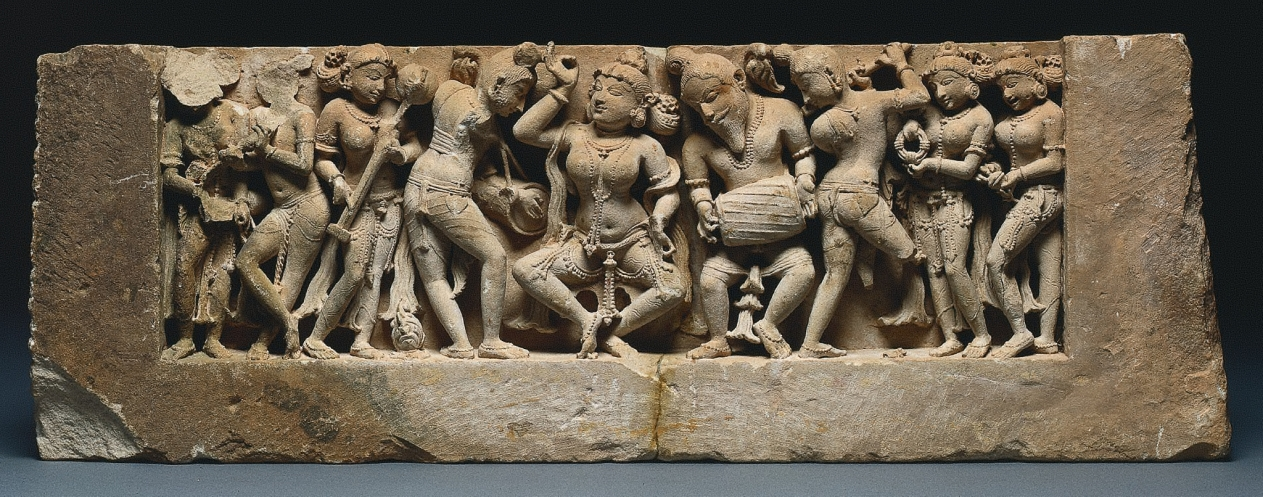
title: Frieze with Dancer and Musicians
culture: Northwestern India, Rajasthan, Sikar, Harshagiri, 10th century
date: c. 973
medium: sandstone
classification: Sculpture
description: A dancer, who strikes a pose in the center, is accompanied by a full orchestra of musicians in lively variegated poses. At the far left, a woman plays the cymbals, her mouth open in song. Twisting turning postures of figures wrought in high relief with little background space behind them are characteristics of Indian sculpture from the medieval period. Music and dance were important components of devotional temple activities; they were considered as pleasing to the divinity and attractive for devotees as the works of sculpture and architecture.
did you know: The twisting, dynamic postures of the musicians in this frieze may visually echo the joyful music they are playing together.